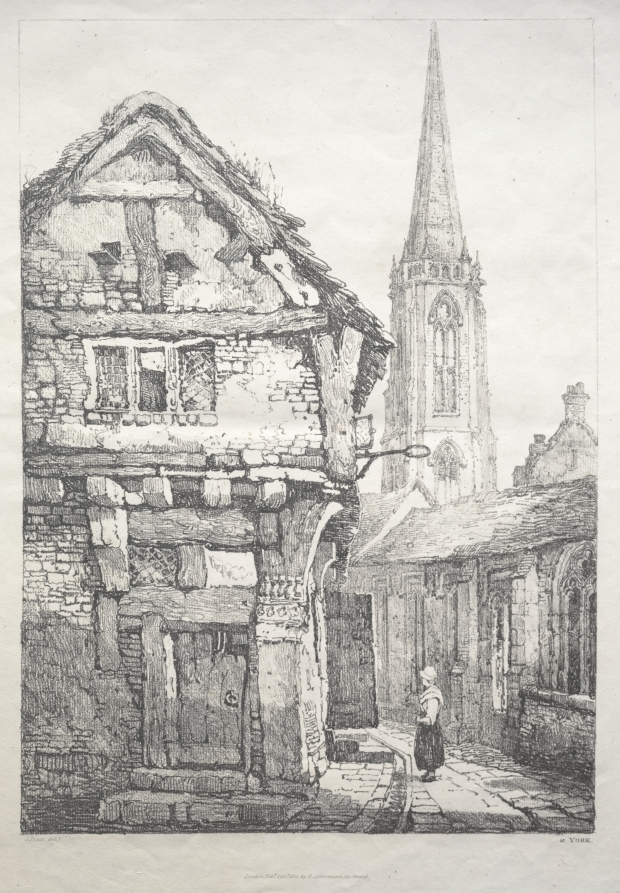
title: A Series of Ancient Buildings and Rural Cottages in the North of England: At York, Street beside Cloister Wall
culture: England, 19th century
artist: Samuel Prout (British, 1783–1852)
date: 1821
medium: softground etching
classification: Print